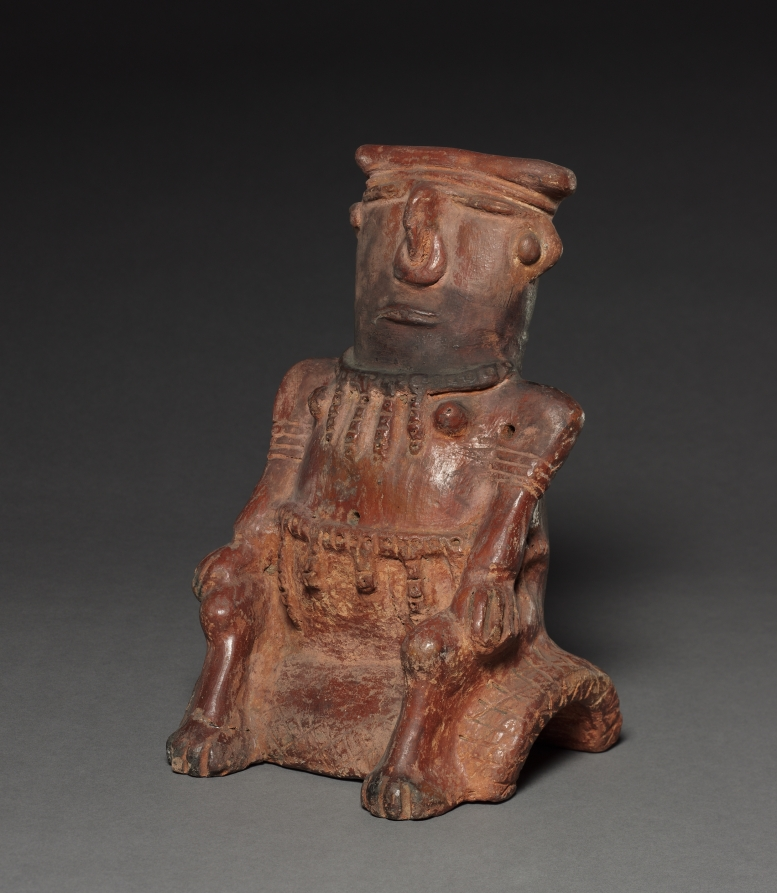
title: Seated Figure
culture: Colombia, 19th-20th century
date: before 1921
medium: red ware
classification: Ceramic